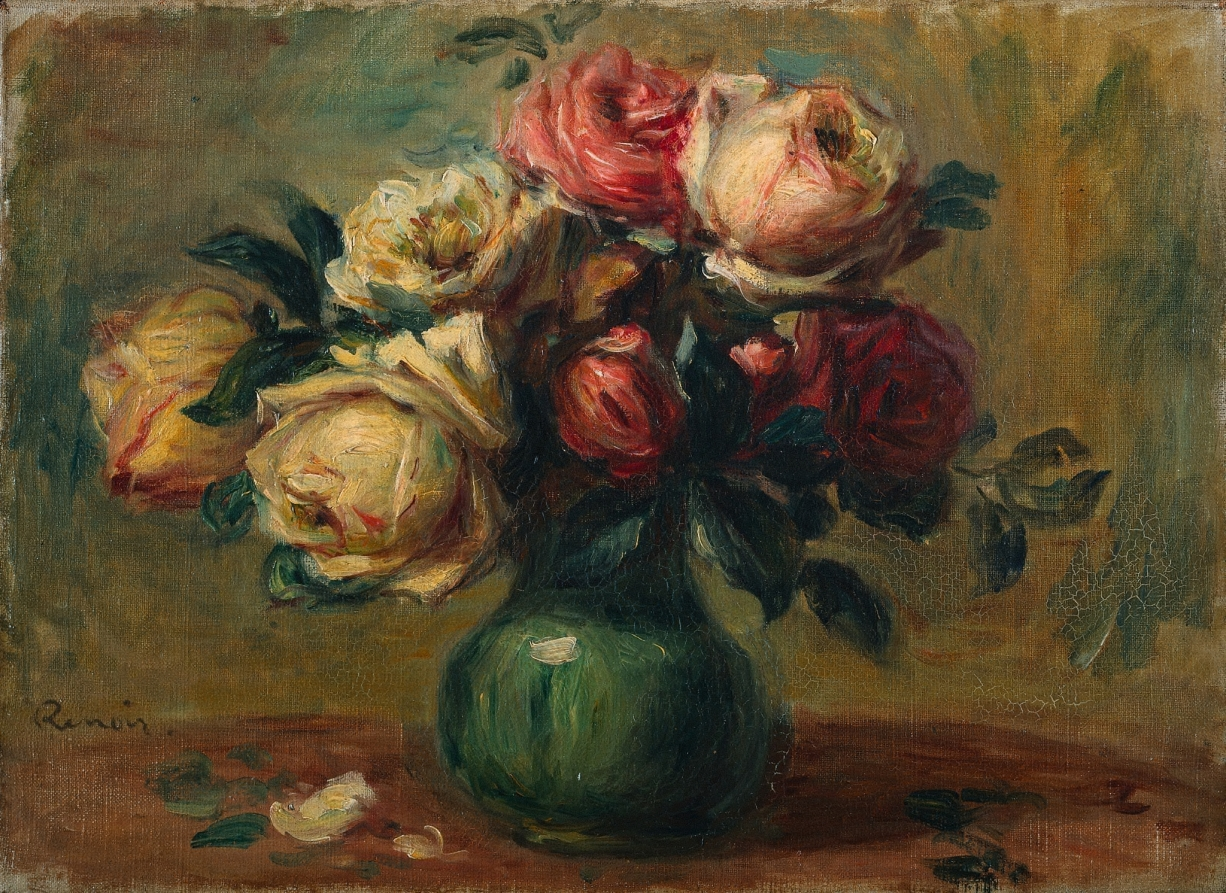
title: Roses in a Vase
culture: France, 19th century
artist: Pierre-Auguste Renoir (French, 1841–1919)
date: c. 1890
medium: oil on fabric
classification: Painting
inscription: Signed lower left: Renoir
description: The palette Renoir used to depict the seven roses in this still life ranges from various shades of red to warm whites, light yellows, and pinks. The artist declared, "'Painting flowers lets my brain rest. It does not cause the same tension of spirit as when I face a model. When I paint flowers, I put down tones, I boldly try values, without having to worry about losing a canvas.'" He was particularly fond of roses, whose full, rounded shapes he likened to the female body. In 1861, Renoir met Claude Monet (1840–1926) and later shared a studio with him. Monet became an important influence on Renoir's art, as can be seen here in the rapid brush strokes, thinly scuffled background, and buildup of paint (impasto) in the blooms.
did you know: Renoir was an excellent singer who wanted to be a musician, but for financial reasons left school at age thirteen to work as an apprentice painter in a porcelain factory.